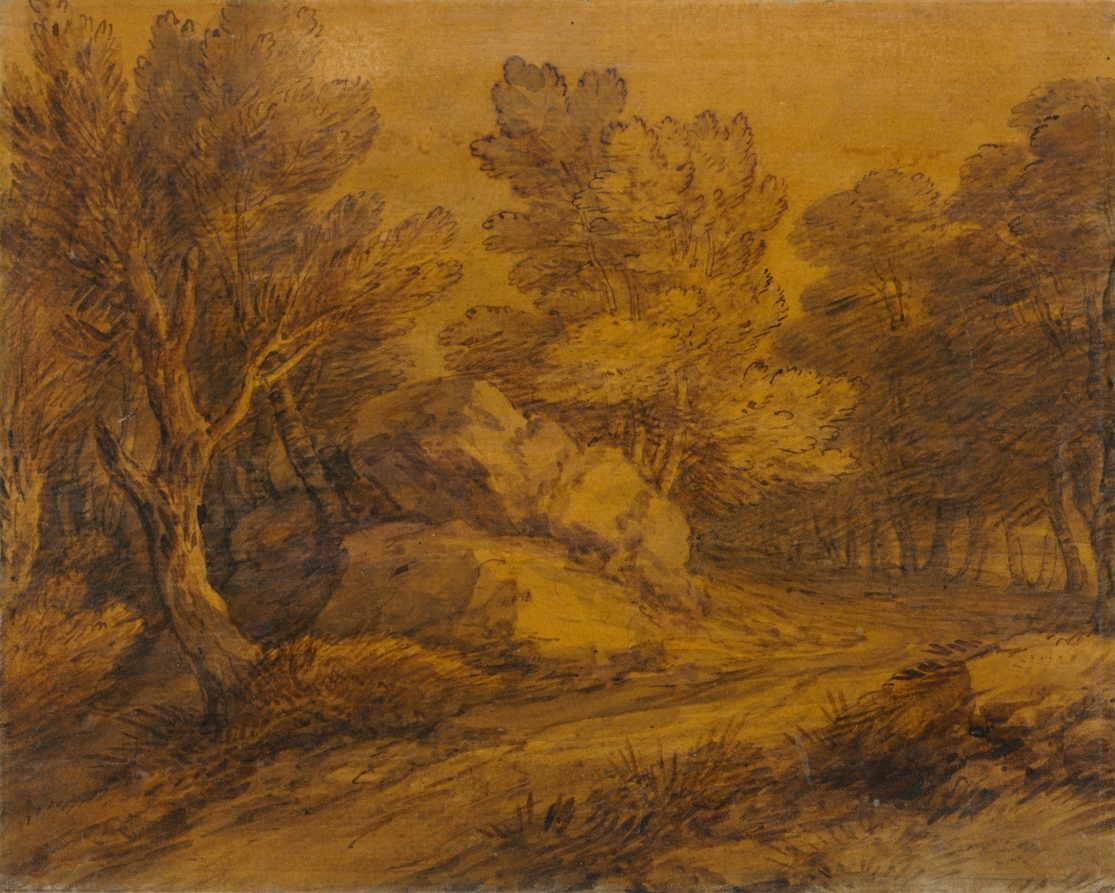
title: Scene with a Road Winding through a Wood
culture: England, 18th century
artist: Thomas Gainsborough (British, 1727–1788)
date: c. 1770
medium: pen and brown ink and brown and grey washes over graphite, varnished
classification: Drawing